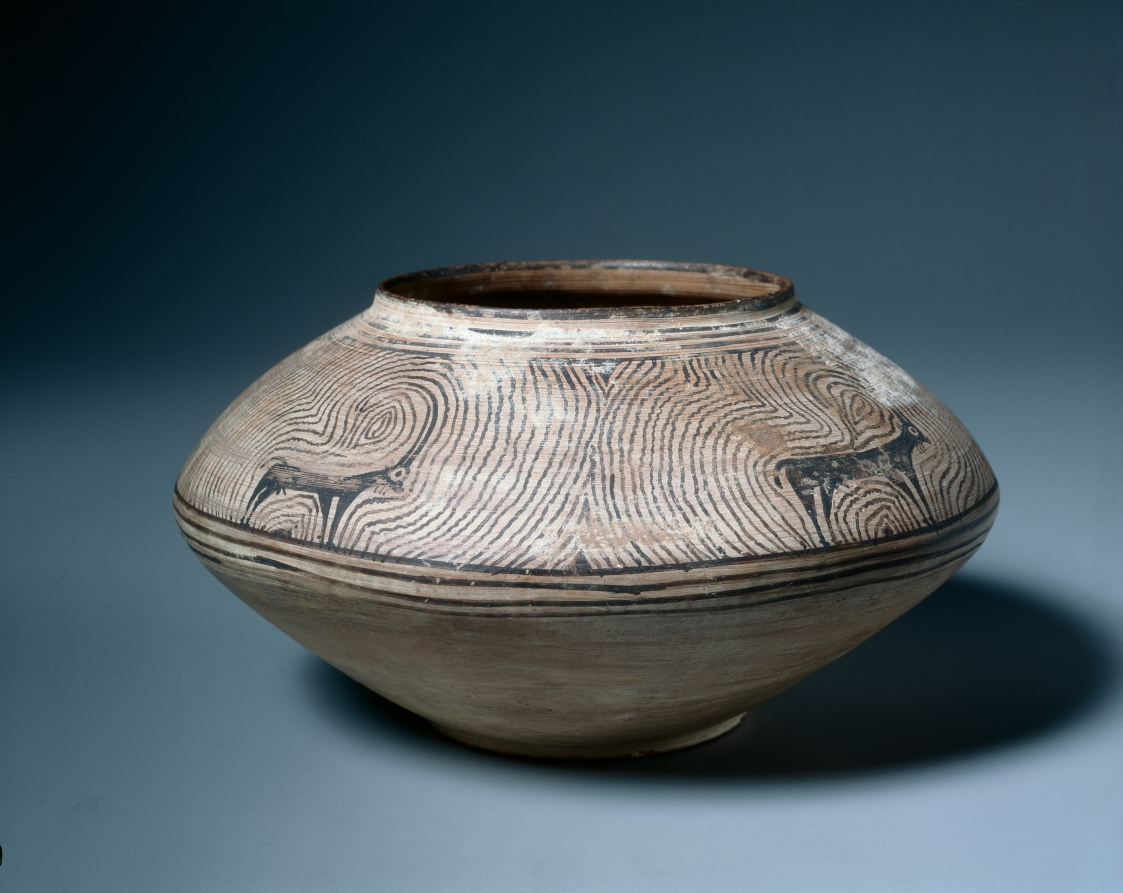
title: Jar with Four Ibex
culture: Pakistan, probably Quetta, Indus Valley Civilization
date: c. 2800–2500 BCE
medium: ceramic with black slip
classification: Ceramic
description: Large numbers of ceramic vessels decorated with black slip have been found among the sophisticated urban settlements of South Asia's protohistoric Indus Valley civilization. The walls of this jar are so thin that it must have been created on a potter's wheel.The four male ibex have two curving horns of exaggerated length, and three hairs under the chin.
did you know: The long-horned ibex is at home in the Himalaya mountains, the source of the Indus River.